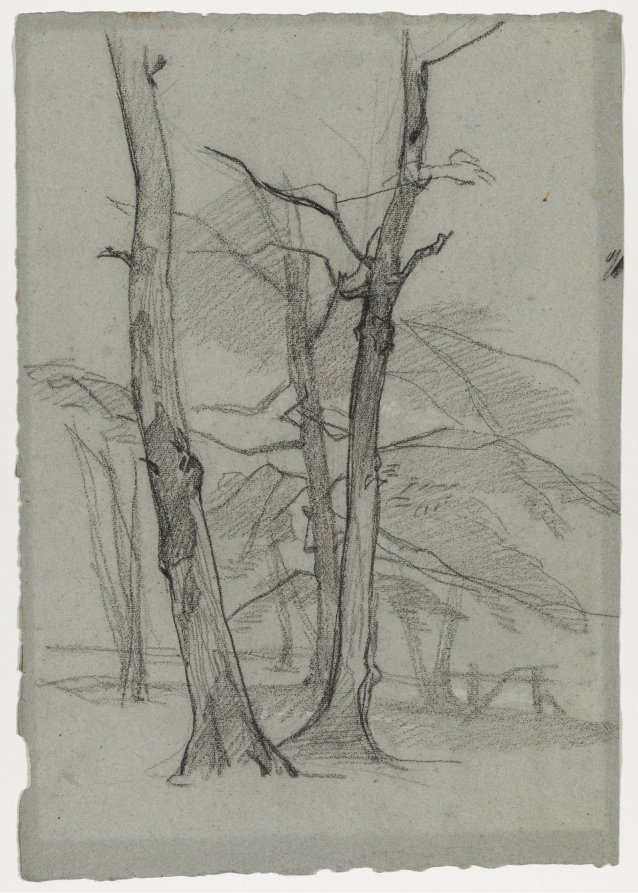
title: Landscape Study with Trees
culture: France, 19th century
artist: Thomas Couture (French, 1815–1879)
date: c. 1870–1875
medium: black chalk with white gouache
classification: Drawing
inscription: VERSO, upper center, in orange crayon: 21